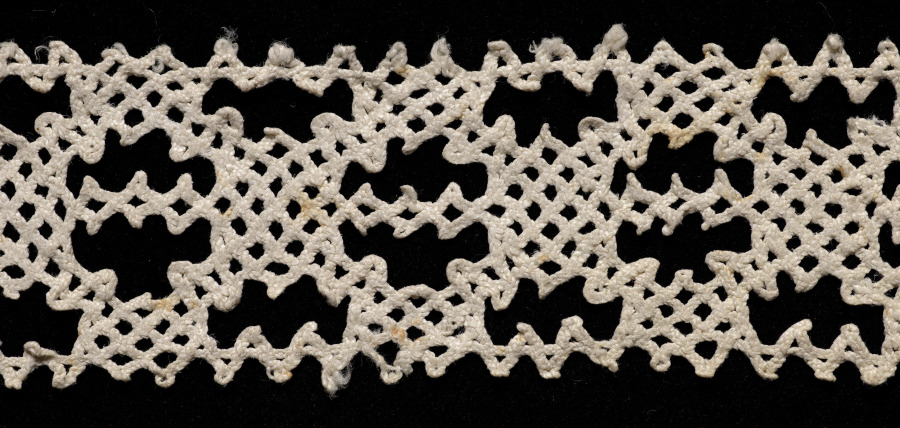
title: Lace Insertion (no selvage)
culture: Italy, Venice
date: 1540–60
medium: Bobbin lace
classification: Lace